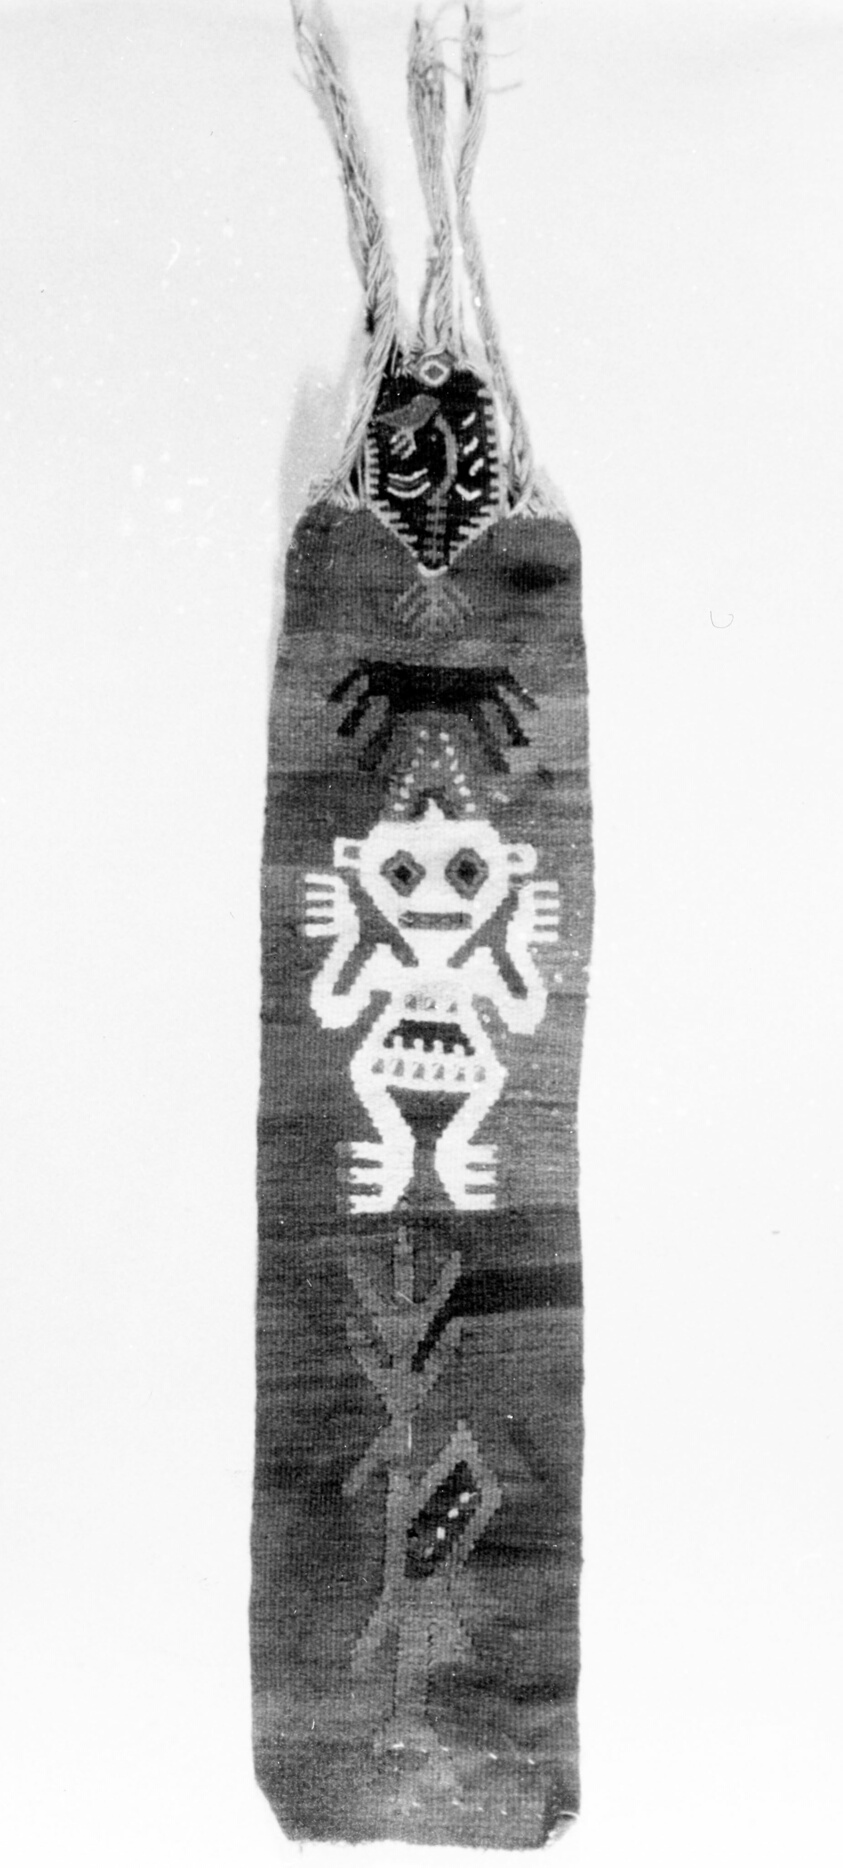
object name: Textile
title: Band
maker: Possibly Rimac; North coast, Peru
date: 1000/1476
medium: Cotton, slit tapestry weave with eccentric outlining wefts and extended warp fringe; embroidered in cotton in single interlacing running stitch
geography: Peru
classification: textile; weaving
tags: super/natural